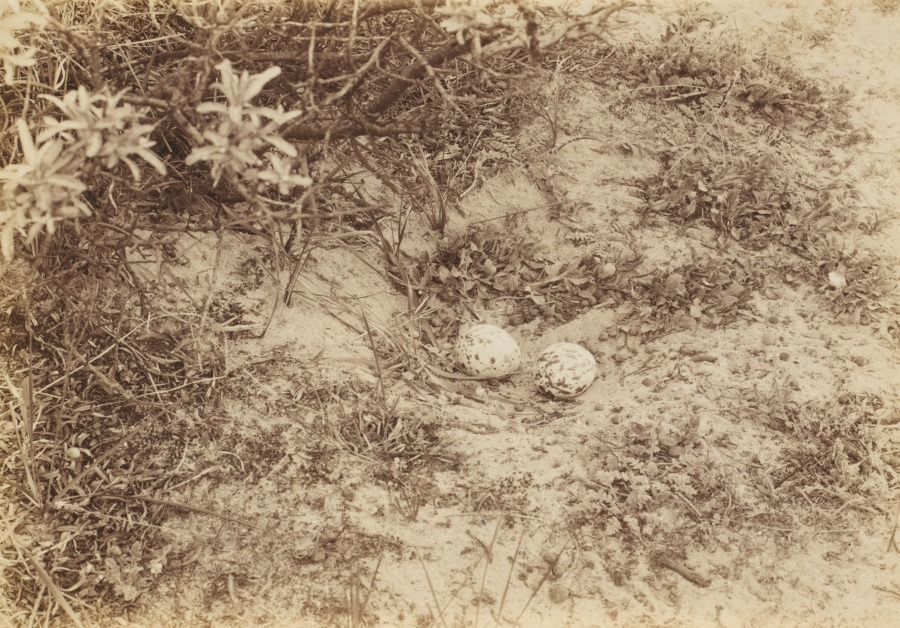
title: Eggs of a Stone-curlew or Plover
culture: Netherlands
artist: Richard Tepe (Netherlandish, 1864–1952)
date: 1900s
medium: silver print on printing out paper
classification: Photograph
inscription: Written in pencil on verso: "2250 10" Written in black ink on verso: "Foto/R.Tepe (signed)"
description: Dedicated to wildlife and natural habitat preservation, Tepe helped bring nature photography into the fine art world. He exhibited his photographs and published articles and pictures in both natural history and art magazines.